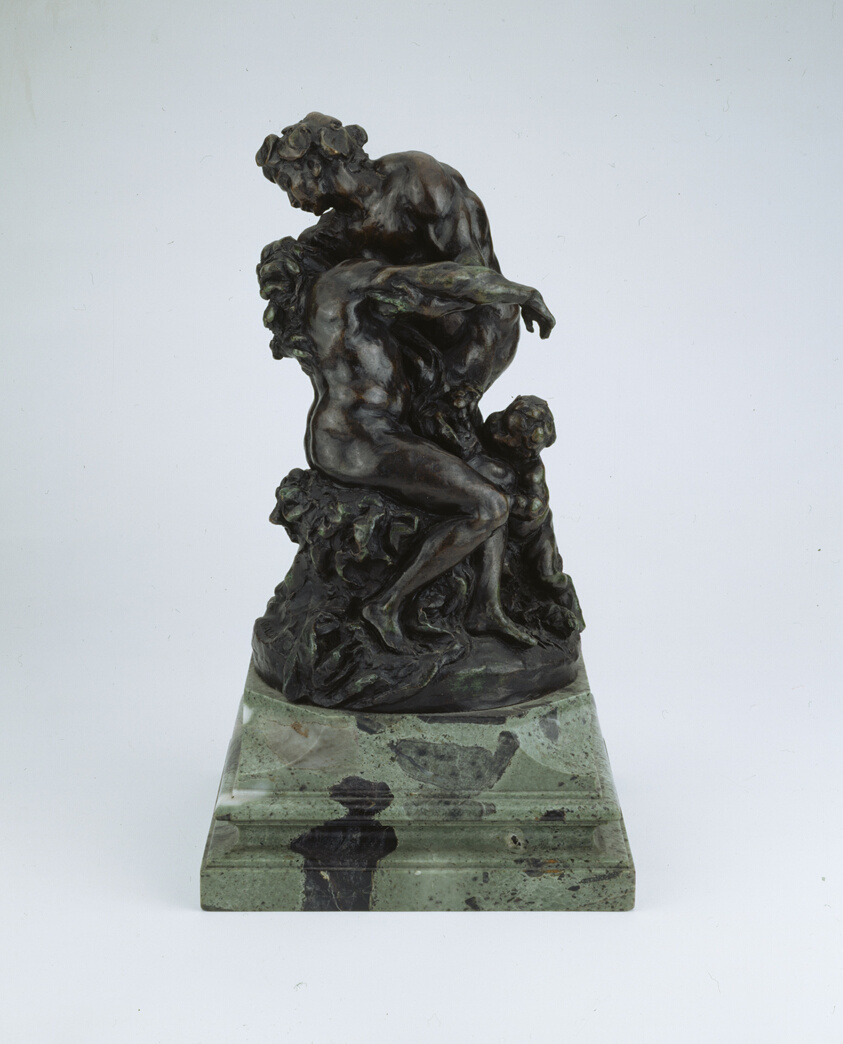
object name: Sculpture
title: Bacchus Consoling Ariadne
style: nineteenth century, 20th Century, 19th century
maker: Aimé-Jules Dalou (French, 1838–1902)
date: Modeled c. 1892, cast 1903/07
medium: Bronze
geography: France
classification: statuette; french; bronze; sculpture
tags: Greek mythology, love, Greek gods, mythological figures, mythology, mythical, fauns/satyrs/pan, nudes, man, woman